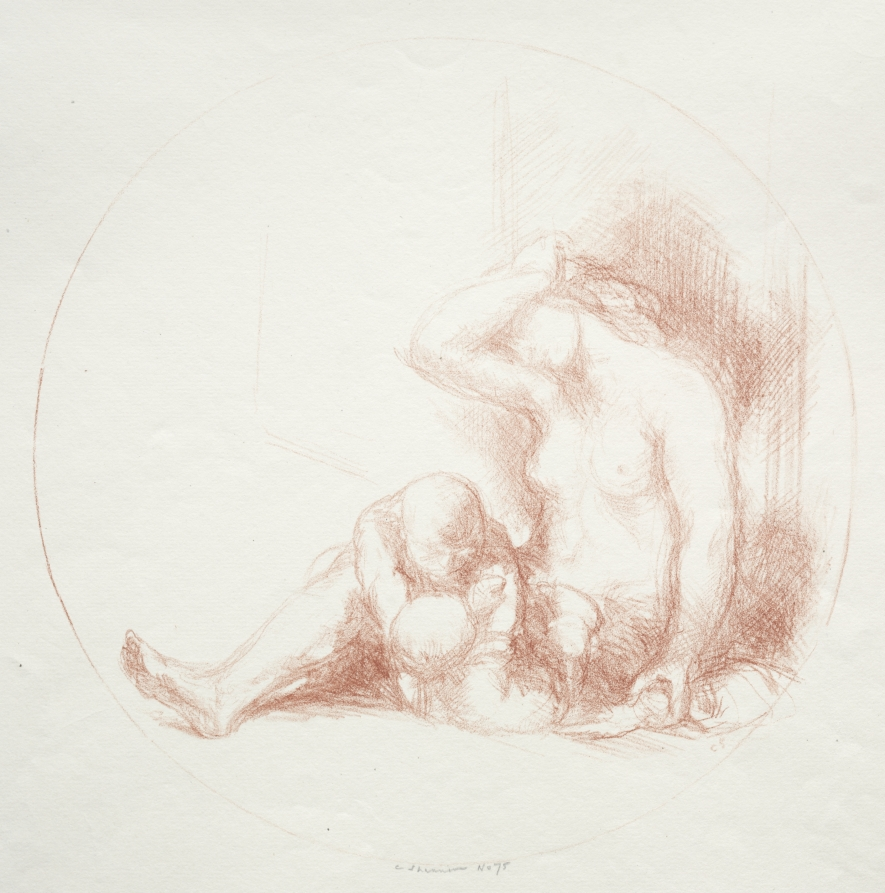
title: Playmates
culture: England, 20th century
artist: Charles Hasslewood Shannon (British, 1863–1937)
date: 1907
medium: lithograph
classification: Print